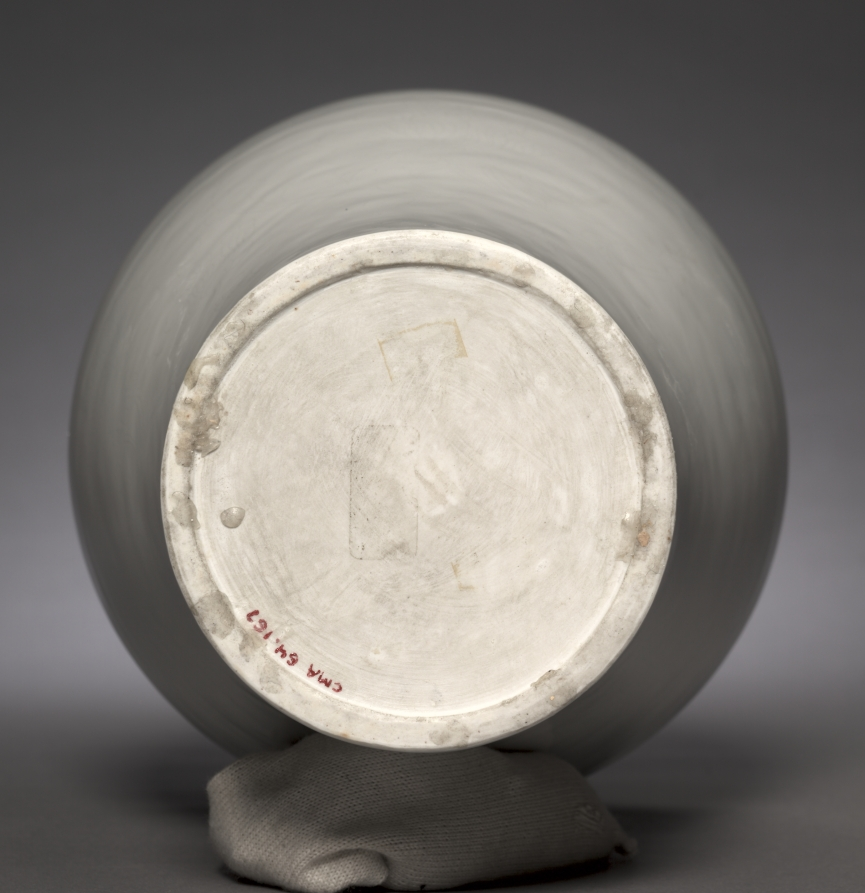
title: Meiping Vase with Cloud Collars and Peony Sprays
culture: China, Jiangxi province, Jingdezhen kilns, Ming dynasty (1368-1644), Yongle period (1403-1424)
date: 1403–24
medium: porcelain with incised decoration and white glaze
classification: Ceramic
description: This beautiful vase, called a meiping, is a testimony to the extremely high standards demanded for imperial white porcelain of the Yongle period. It is exquisitely potted and subtly decorated with "hidden decoration" (anhua) incised into the body. The clear glaze over the white body has a luster and purity; the white color radiates with a soft glow like melting snow, described by the Chinese connoisseurs as tianbai, or "sweetwhite." Tianbai wares were produced for use in imperial offerings and have always been considered a great achievement of the Yongle period.